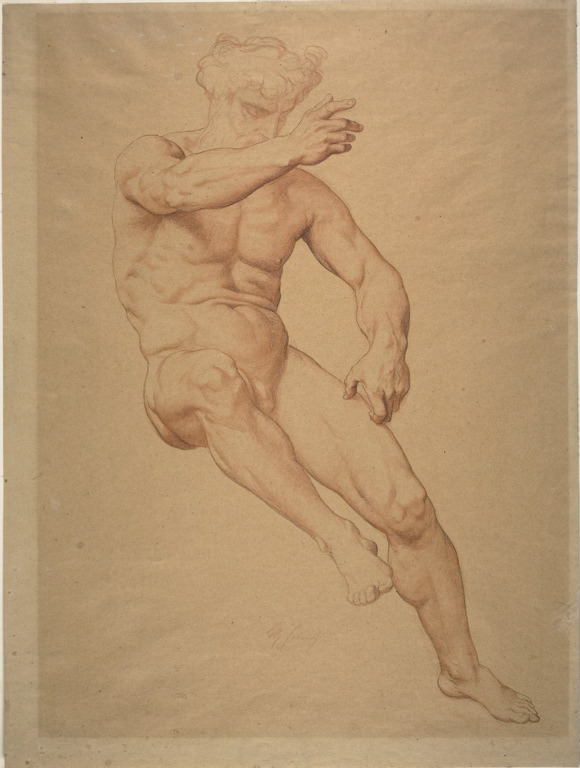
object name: Drawing and Watercolor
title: Academic Nude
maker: Alexandre Cabanel (French, 1823-1889)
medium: Red and brown Conté crayon on tan wove paper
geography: France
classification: conté crayon; drawings (visual works); prints and drawing